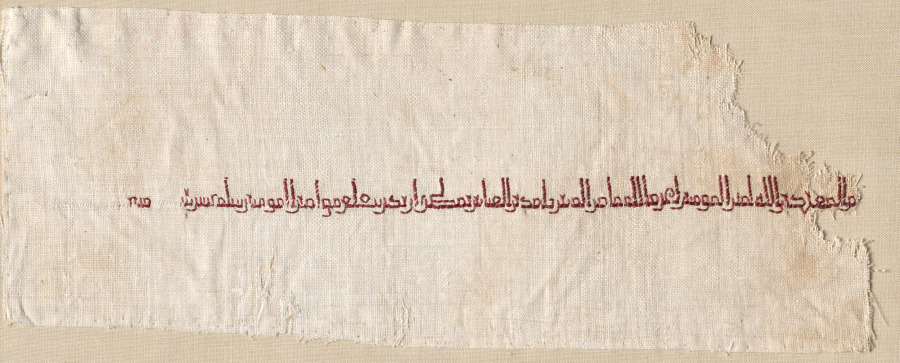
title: Fragment of a Tiraz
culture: Egypt, Misr, Second Abbasid period, Caliphate of al-Muqtadir, AH 310 (A.D. 922-923)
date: 922–923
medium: silk embroidery on linen tabby ground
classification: Embroidery